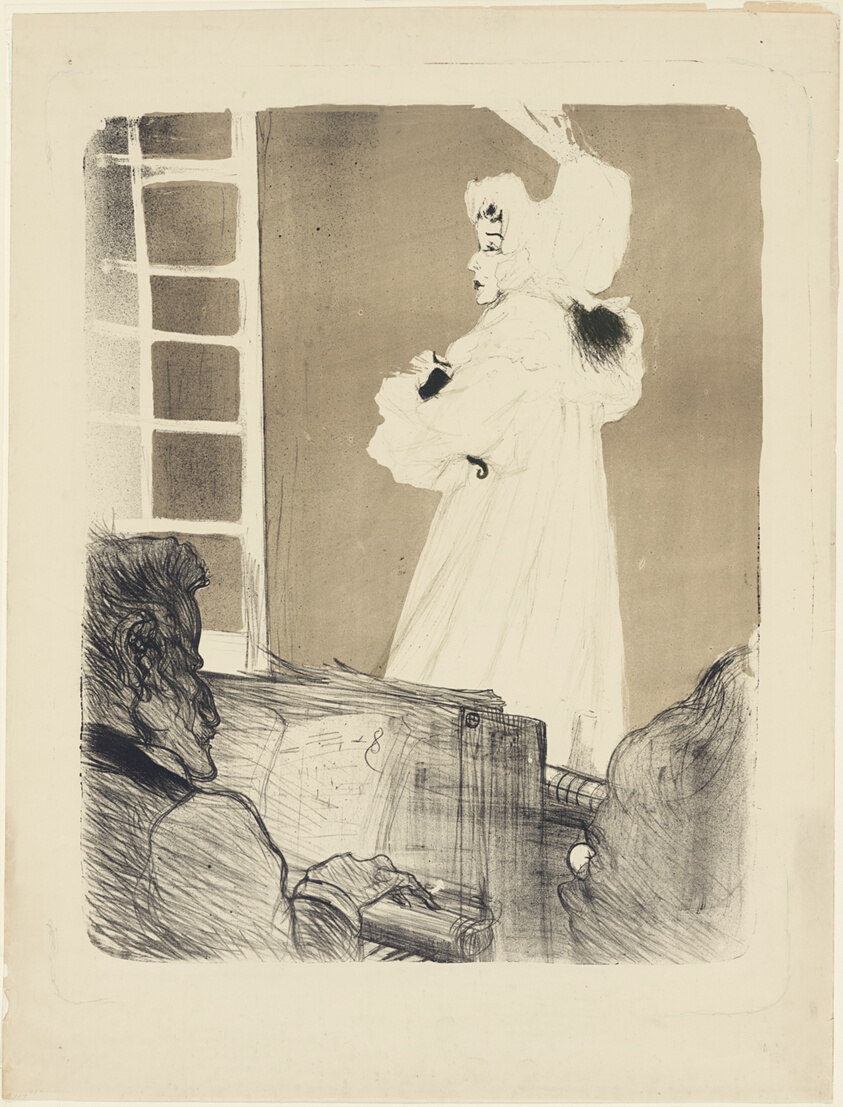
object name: Print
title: Miss May Belfort (large plate)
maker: Henri de Toulouse-Lautrec (French, 1864-1901)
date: 1895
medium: Color lithograph on cream wove paper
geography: France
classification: lithograph; print; prints and drawing